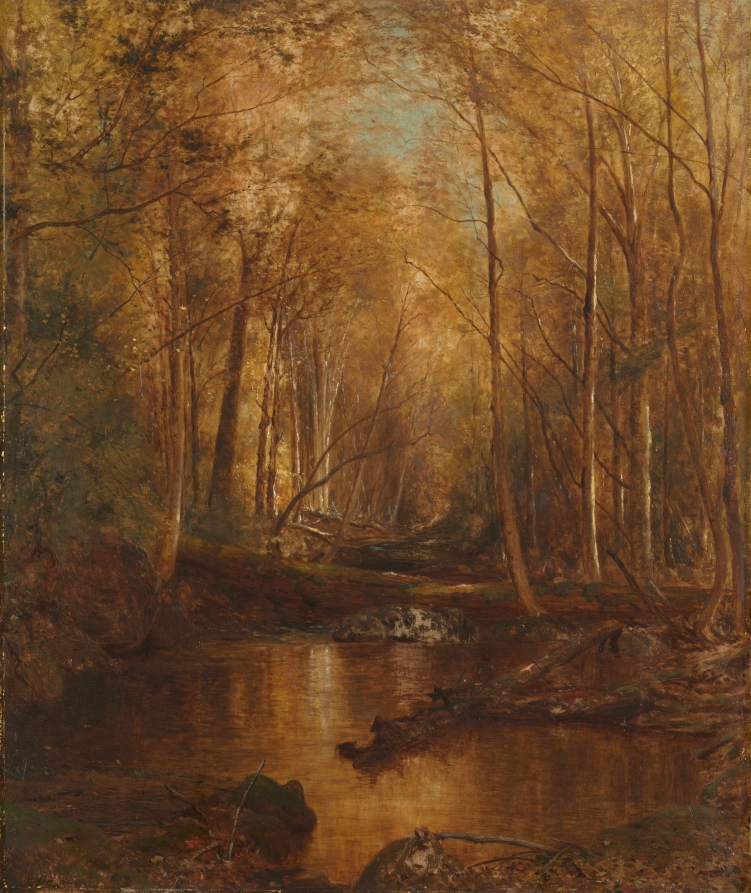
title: Autumn in the Catskills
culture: America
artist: Jervis McEntee (American, 1828–1891)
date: 1873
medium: oil on canvas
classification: Painting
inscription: Signed lower left: "JMcEntee / 1873 [J M in monogram]